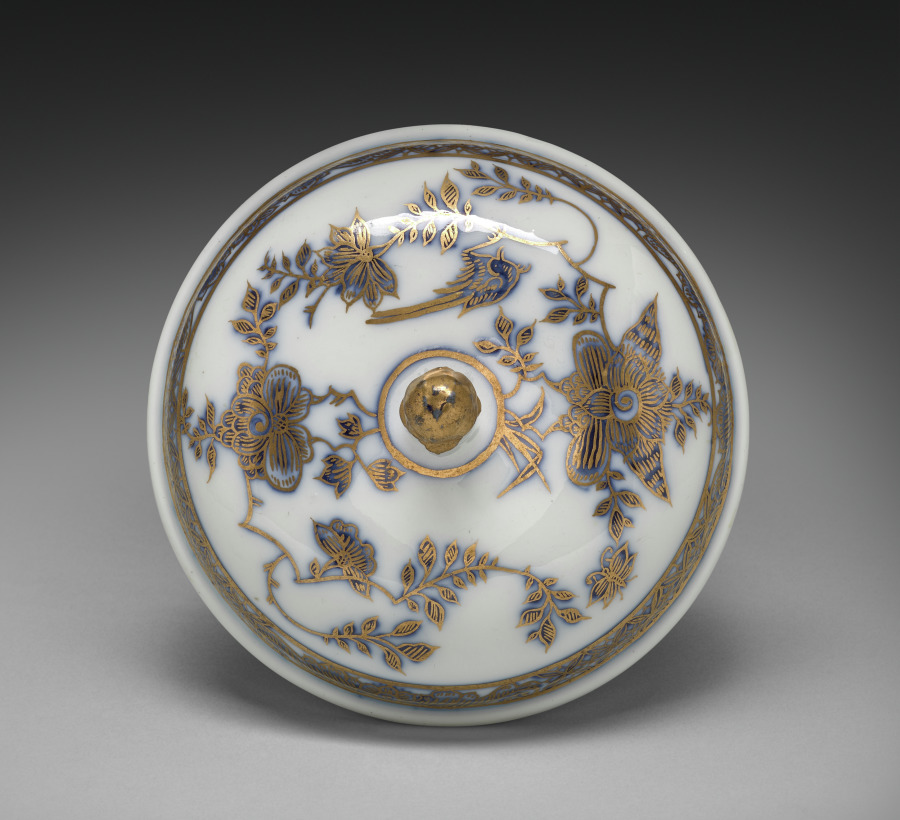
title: Cover for a Broth Bowl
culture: Germany, Meissen, 18th century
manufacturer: Meissen Porcelain Factory (German, est. c. 1710)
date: 1730–40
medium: gilt porcelain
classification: Ceramic